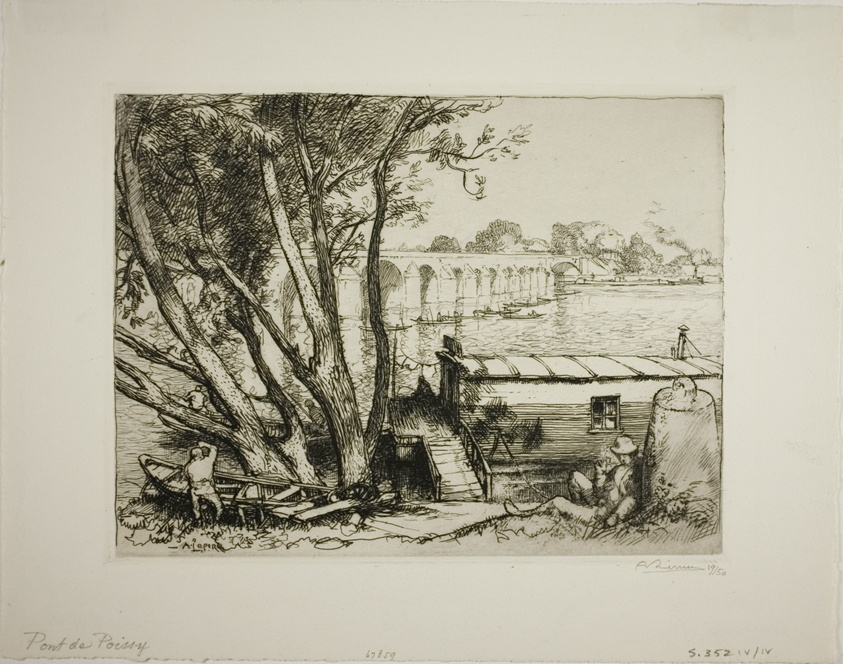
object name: Print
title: Poissy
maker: Louis Auguste Lepère (French, 1849-1918)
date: 1908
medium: Etching on cream wove paper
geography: France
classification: etching; print; prints and drawing